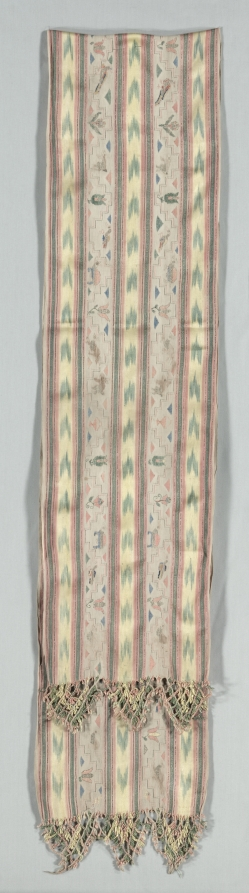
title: Scarf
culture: Mexico, late 18th-19th century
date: late 1700s-1800s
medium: weaving, embroidery and ikat techniques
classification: Textile